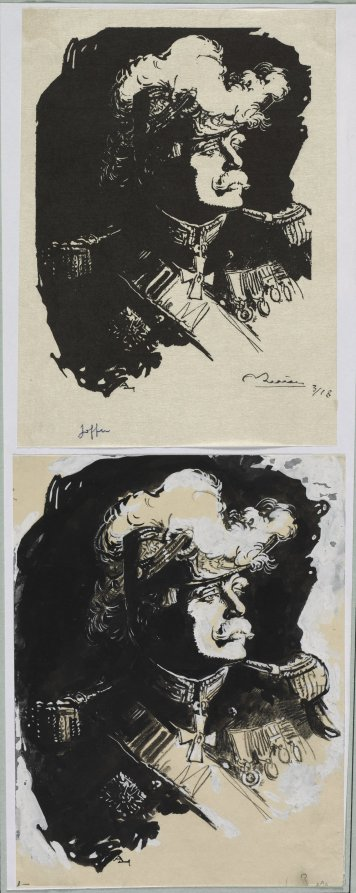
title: Maréchal Joffre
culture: France, 20th century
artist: Auguste Louis Lepère (French, 1849–1918)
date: 1914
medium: brush and black ink, black crayon, heightened with white gouache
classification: Drawing